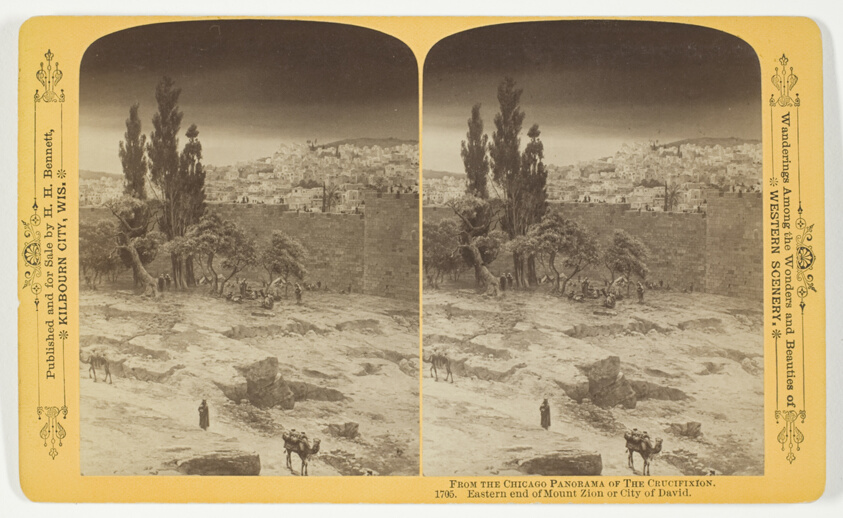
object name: Photograph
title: Eastern end of Mount Zion or City of David, from the series "The Chicago Panorama of The Crucifixion"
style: 19th century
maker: Henry Hamilton Bennett (American, born Canada, 1843-1908)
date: 1893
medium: Albumen print, stereo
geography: Chicago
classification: photography; photograph; albumen silver print; stereograph (albumen)